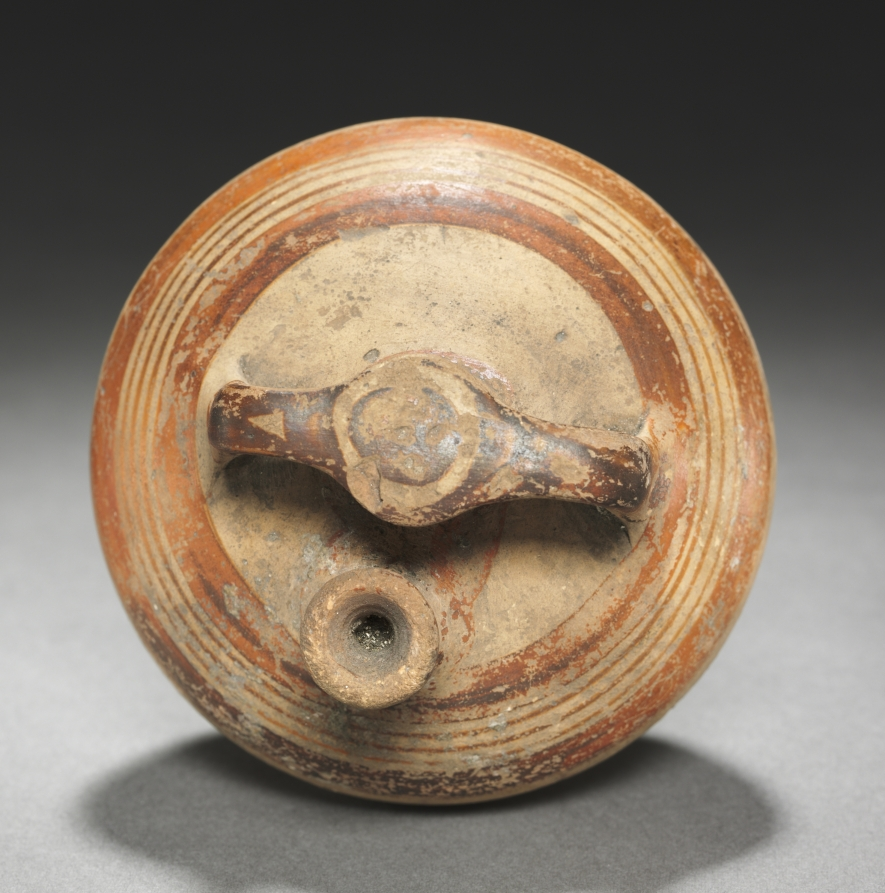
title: Miniature Stirrup Jar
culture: Cyprus, late Helladic III A2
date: c. 1350–1300 BCE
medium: Cypro-Mycenaean ware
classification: Ceramic